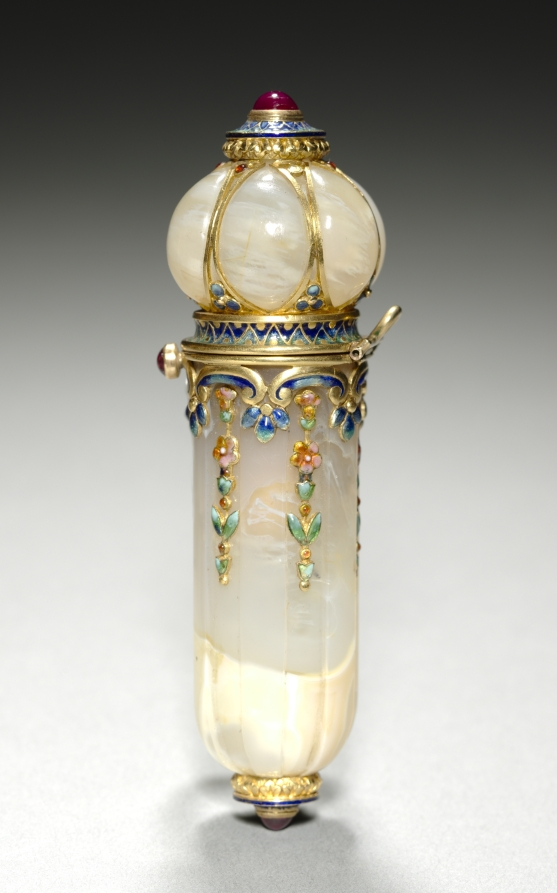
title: Perfume Vial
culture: France, Paris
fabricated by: Tecla Firm (French)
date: c. 1900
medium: agate with enamel, gold, rubies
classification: Miscellaneous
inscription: "Tiffany & Co." engraved at edge of top.